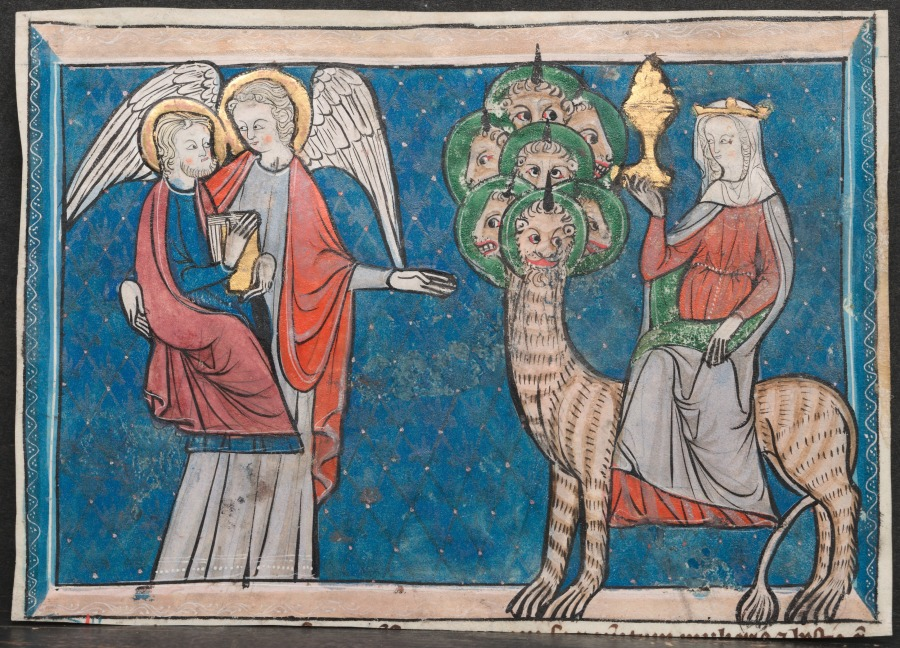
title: Miniature from a Manuscript of the Apocalypse: The Woman upon the Scarlet Beast and The Fall of Babylon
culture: France, Lorraine, 13th century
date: c. 1295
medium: ink, tempera, and gold on vellum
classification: Manuscript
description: The visionary text of Saint John the Evangelist's Apocalypse, the final book of the New Testament, inspired these images of salvation, sin, and divine retribution. A large number of illustrated volumes of the Apocalypse appeared in Northern Europe, especially in England, after the year 1240, perhaps reflecting a fear of the world's end.